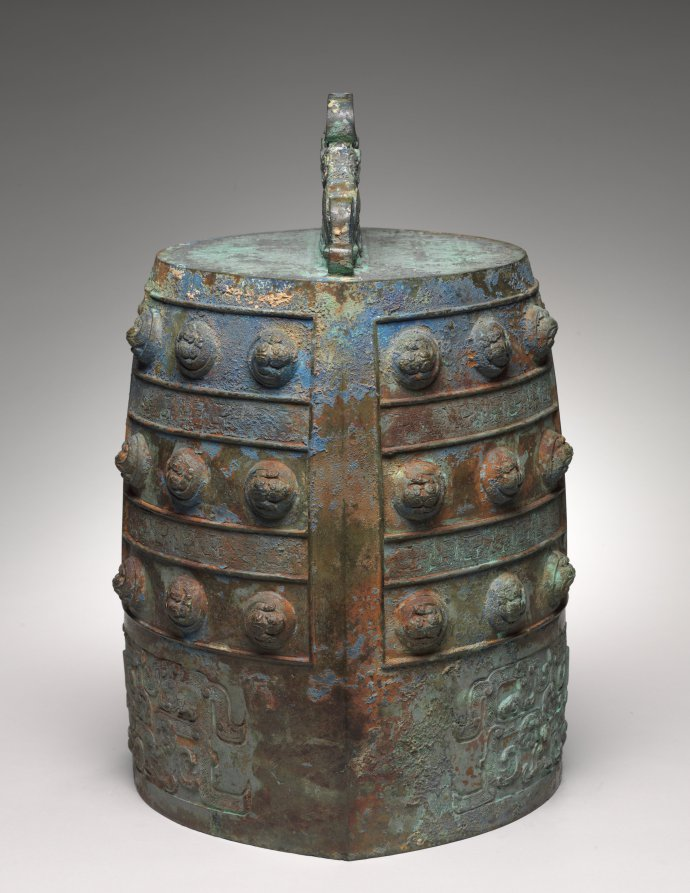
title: Bell (Bo Zhong)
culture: China, Eastern Zhou dynasty (770–256 BCE)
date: early 400s BCE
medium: bronze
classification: Metalwork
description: Music in the Eastern Zhou dynasty not only served ritual purposes but also provided entertainment in feudal courts. The elliptical cross-section of the Chinese bronze bell is unique; it could produce two notes depending on where the bell is struck, either at the rim or near the center. The bell is suspended when played and often belongs to a graduated set arranged according to pitch and size. This bell displays elaborate ornamentation and exquisite workmanship. A twin-bodied serpent intertwined with two tigers forms the suspension loop at the top. Coiled serpents form the knobs on the body. The lower part bears an animal mask, its horns interlaced with abstract bird designs.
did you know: The bell could produce two notes depending on where it is struck.